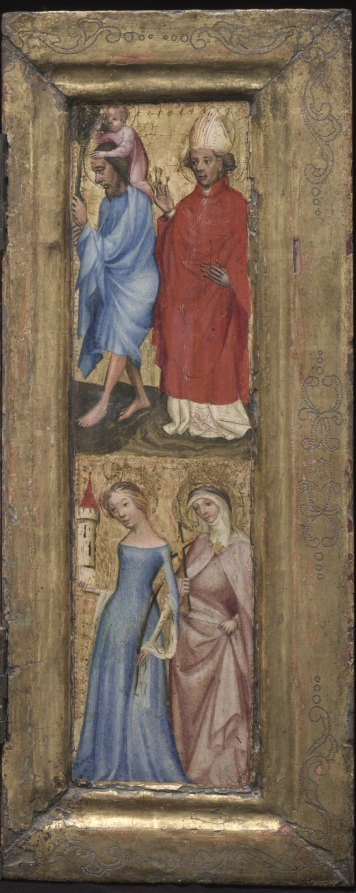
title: St. Christopher, St. Erasmus, St. Barbara, and another female saint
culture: Austria, Salzburg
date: c. 1424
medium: tempera and gold on wood (oak)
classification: Painting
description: This small winged altarpiece, called a triptych, was undoubtedly made for private use. The donor and his wife are shown in the lower central scene kneeling before the Virgin, her mother Saint Anne, and the Christ child. Above is the Epiphany with the Three Kings presenting gifts to a tightly swaddled Christ.